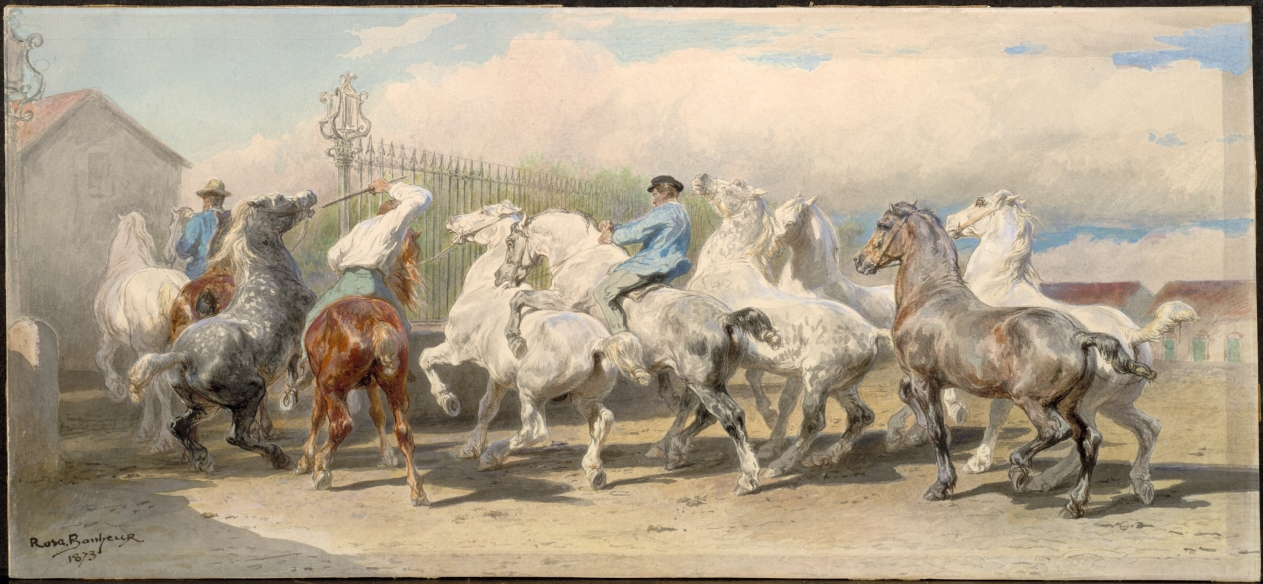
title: Return from the Horse Fair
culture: France, 19th century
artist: Rosa Bonheur (French, 1822–1899)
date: 1873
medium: watercolor and gouache over graphite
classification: Drawing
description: Rosa Bonheur was the first woman artist to receive the Cross of the French Legion of Honor, a French civilian and military decoration. She achieved great official and commercial success, especially for her carefully finished and naturalistic paintings of animals. This watercolor displays Bonheur's technical mastery and her close study of anatomy, as well as her appreciation for the natural beauty of the horses. The animals are arranged in a shallow frieze across the long composition, and their manicured tails, along with the riders' costumes and the finely-wrought iron fence, identify them as stock from the historic national breeding stables.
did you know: This drawing is one of numerous sheets relating to a large-scale painting now in the collection of the Metropolitan Museum of Art.